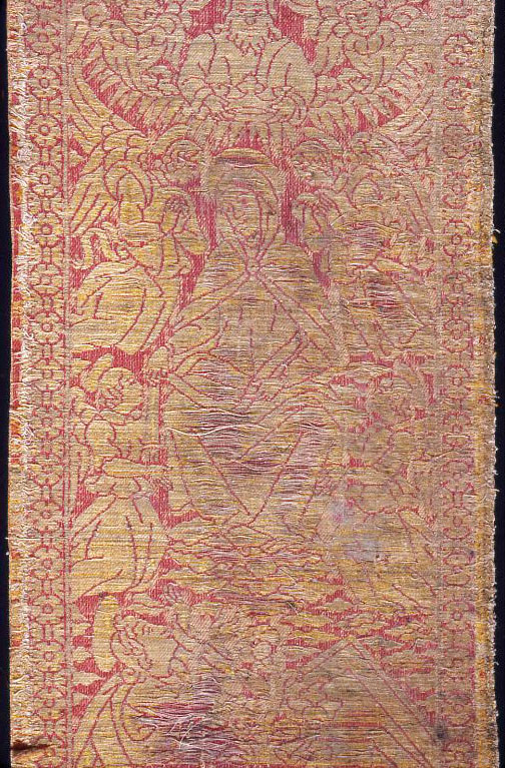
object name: Religious/Ritual Object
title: Orphrey Depicting the Resurrection of St. Mary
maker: Italy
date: 1450/1500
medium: Silk, gold gilt strip wound around linen fiber core, integrated weave of warp-float faced satin weave and twill weave with supplementary patterning wefts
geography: Italy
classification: textile; weaving; liturgical; ritual objects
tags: saints